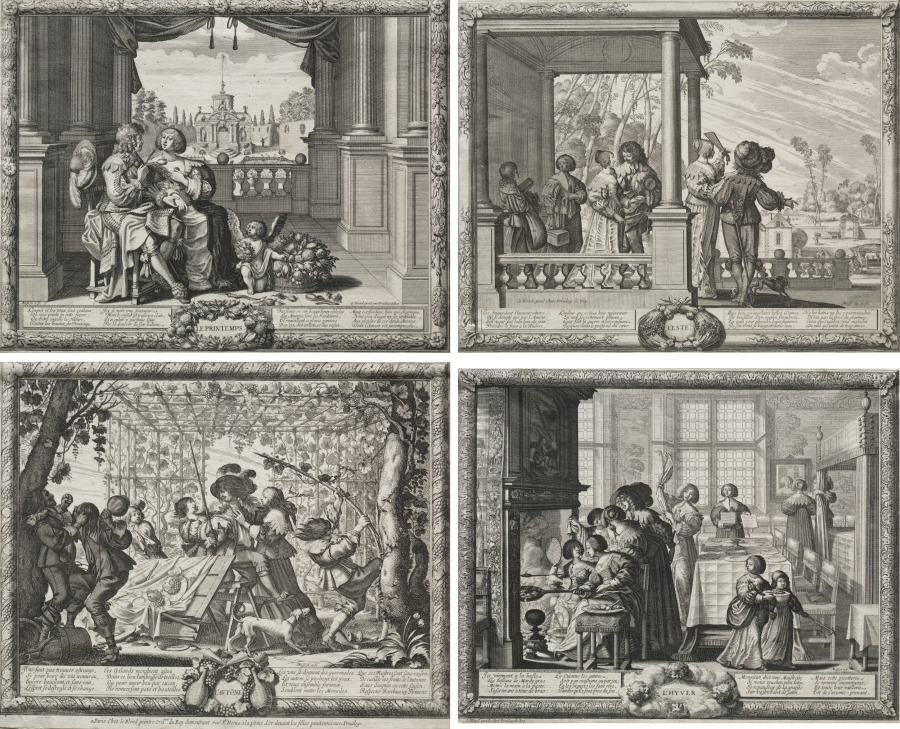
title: The Four Seasons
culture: France, 17th century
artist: Abraham Bosse (French, 1602–1676)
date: 1635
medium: engraving and etching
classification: Print